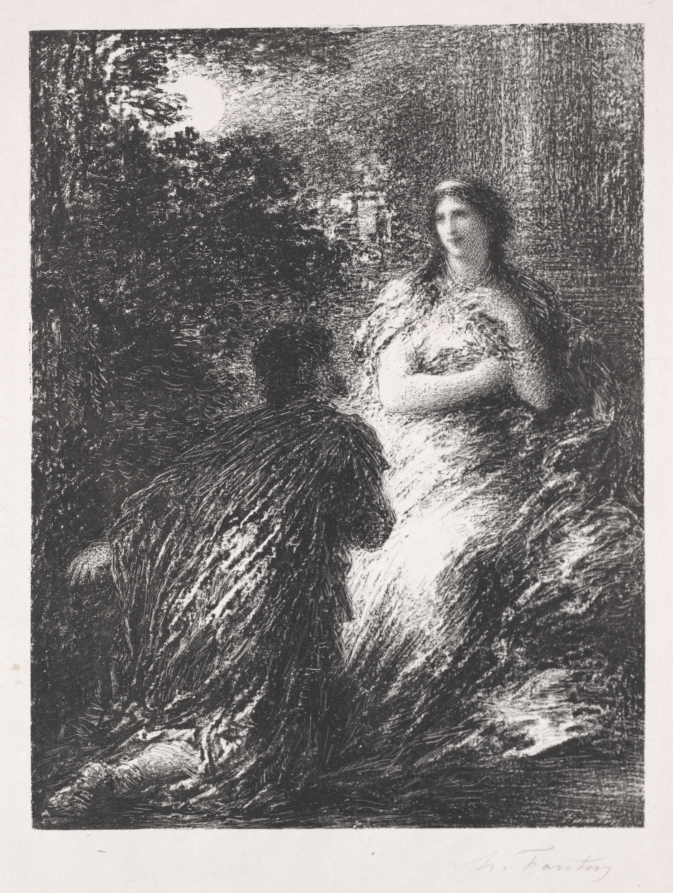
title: Duo des Troyens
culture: France, 19th century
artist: Henri Fantin-Latour (French, 1836–1904)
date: 1894–1895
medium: lithograph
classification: Print